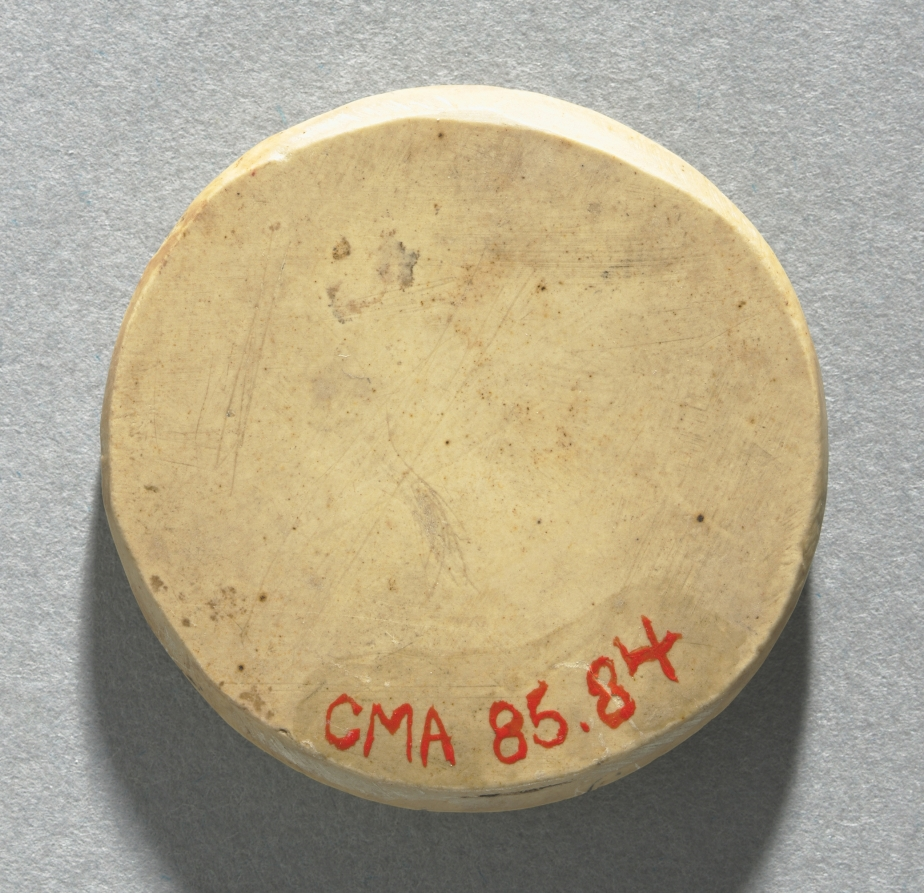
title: Model for a Medal of Adrien de la Deuse at Age 23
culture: Flanders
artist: attributed to Jacob Zagar (Flemish)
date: c. 1550–75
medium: hone (fine-grained whetstone)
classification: Sculpture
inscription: around the circumference: D.ADR. DE LA DEVSE.AN. 23.SVAE.AET.L.F.; inscribed under truncated arm of the sitter: "z"